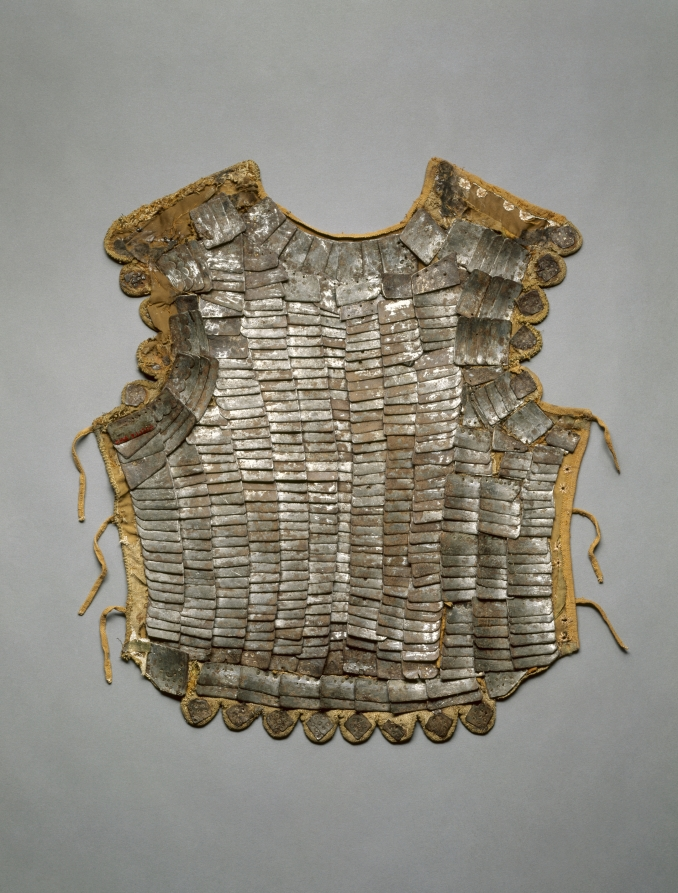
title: Body Guard (Brigandine)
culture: Italy (?), early 16th Century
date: c. 1500–1525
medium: linen; gold velvet; steel; brass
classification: Arms and Armor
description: The brigandine is a light, vest-like body defense popular with both knights and infantry from the 1400s through about 1550. It is constructed of multiple small plates attached to a cloth covering. Finer examples, like this one, are faced in velvet or fabric made of gold thread. The lightweight brigandine provided protection from the weather, and was extremely flexible.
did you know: This vest only weighs about five and a half pounds, considerably lighter than plate armor.